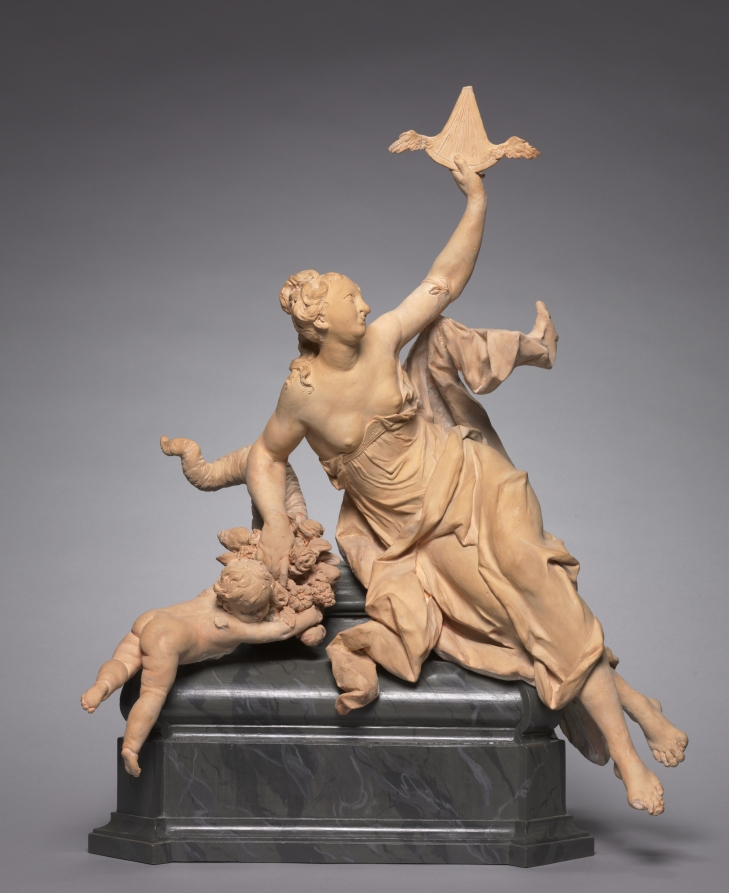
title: Abundance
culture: Austria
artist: attributed to Lorenzo Matielli (Austrian, c. 1688–1748)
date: c. 1730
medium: terracotta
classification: Sculpture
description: This work is probably a model for a garden statue that came from Castle Neuwartenburg near Vocklabruck. Castle Neuwartenburg was built from plans by Domenico Martinelli, with frescoes by Altomonte and sculpted decorations of the doorway and gardens by Lorenzo Matiellli (who also designed the door figures of the Cloisters at Melk and St. Michael's church in Vienna). The completion and dedication of the castle took place in 1732 with a personal visit by Emperor Karl VI. The statue was never executed, and the model remained in the castle.